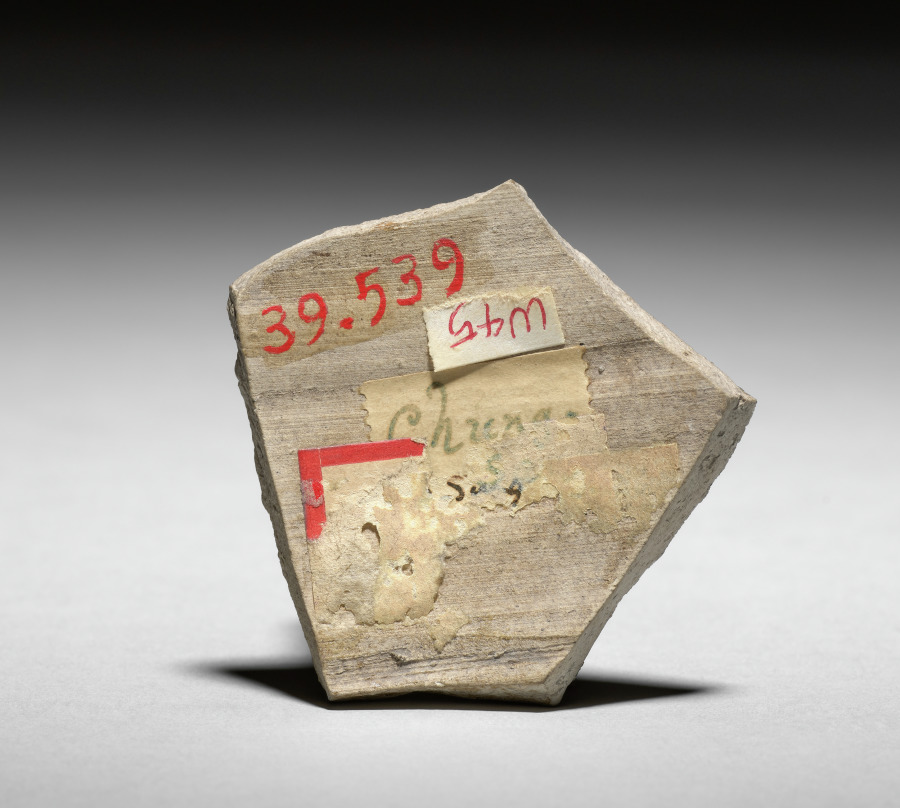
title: Pottery Fragment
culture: Siam, Sawankhalok ware, late 13th-14th Century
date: late 1200s-1300s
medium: stoneware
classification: Ceramic